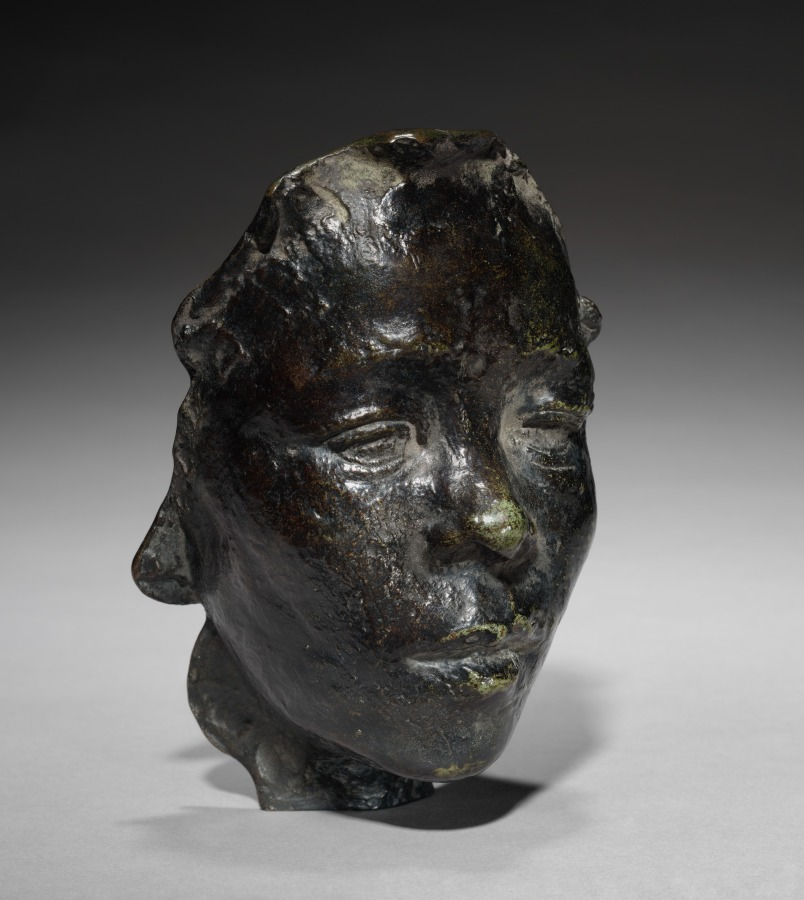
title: Mask of the Japanese Actress Hanako (Ohta Hisa)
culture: France, early 20th Century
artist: Auguste Rodin (French, 1840–1917)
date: 1908 (?)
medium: bronze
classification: Sculpture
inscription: Signed sinister side of neck: "A. Rodin"; inside sinister side in relief: "A. Rodin"